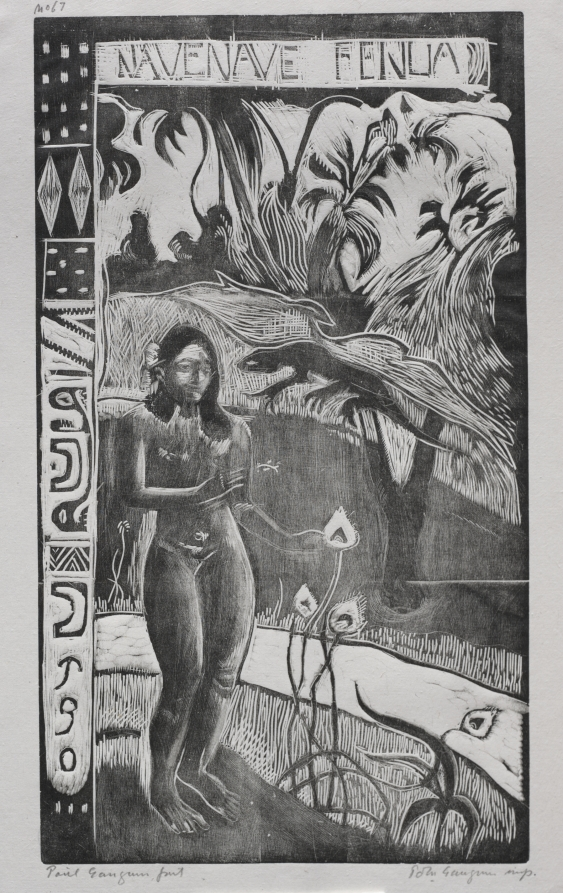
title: Tahitian Series: Land of Delights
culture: France, 19th century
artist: Paul Gauguin (French, 1848–1903)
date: 1893–94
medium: woodcut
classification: Print